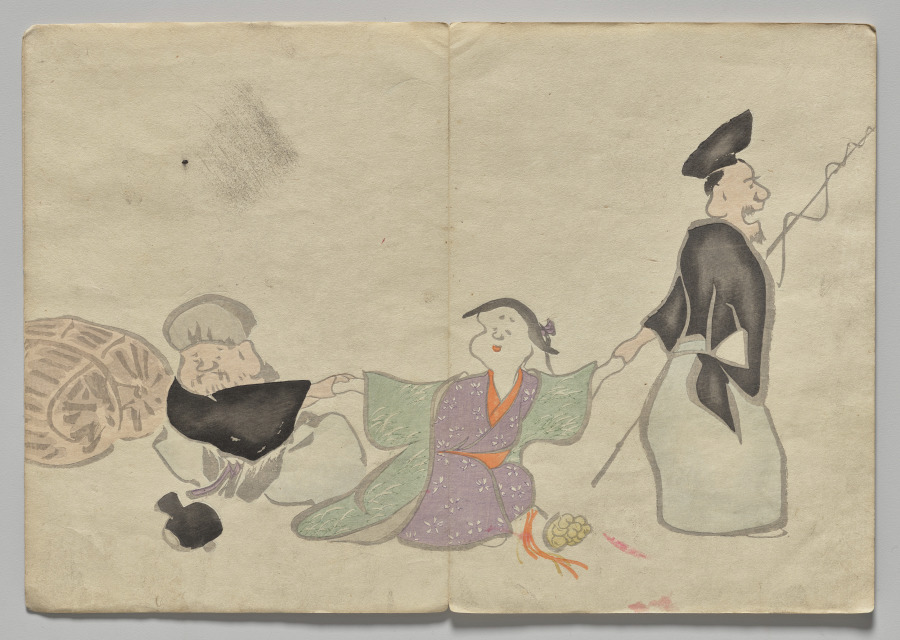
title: Scene from The Kōrin Picture Book (Volume 1)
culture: Japan, Edo period (1615–1868)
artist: Nakamura Hōchū (Japanese, d. 1819)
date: 1800s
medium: color woodblock printed book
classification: Bound Volume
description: Ogata Korin (1658-1716) was one of the most admired artists of Rimpa, or "decorative school painting." These books by the charming later-generation Rimpa artist Hochu record Korin's inventive designs.